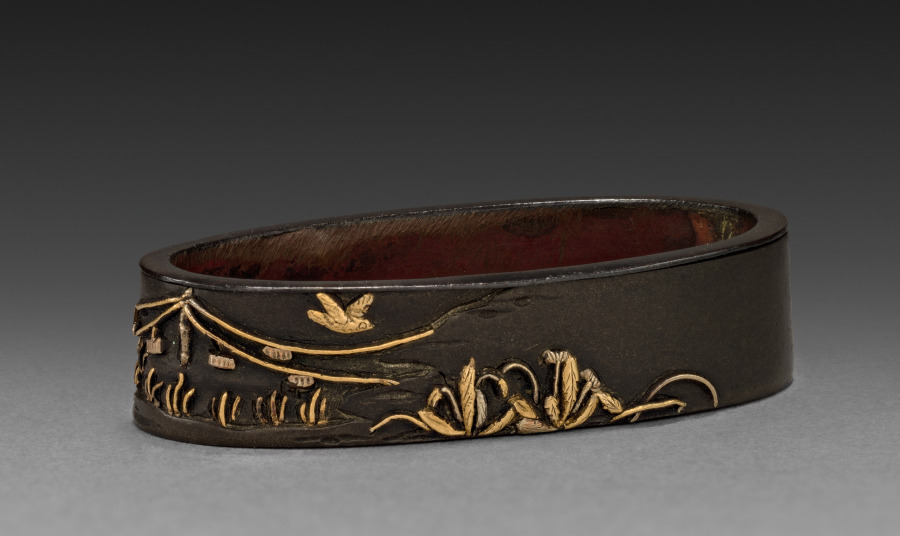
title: Sword-Hilt Collar (Fuchi)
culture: Japan, Edo period (1615–1868)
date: 1700–1850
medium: shakudo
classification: Arms and Armor